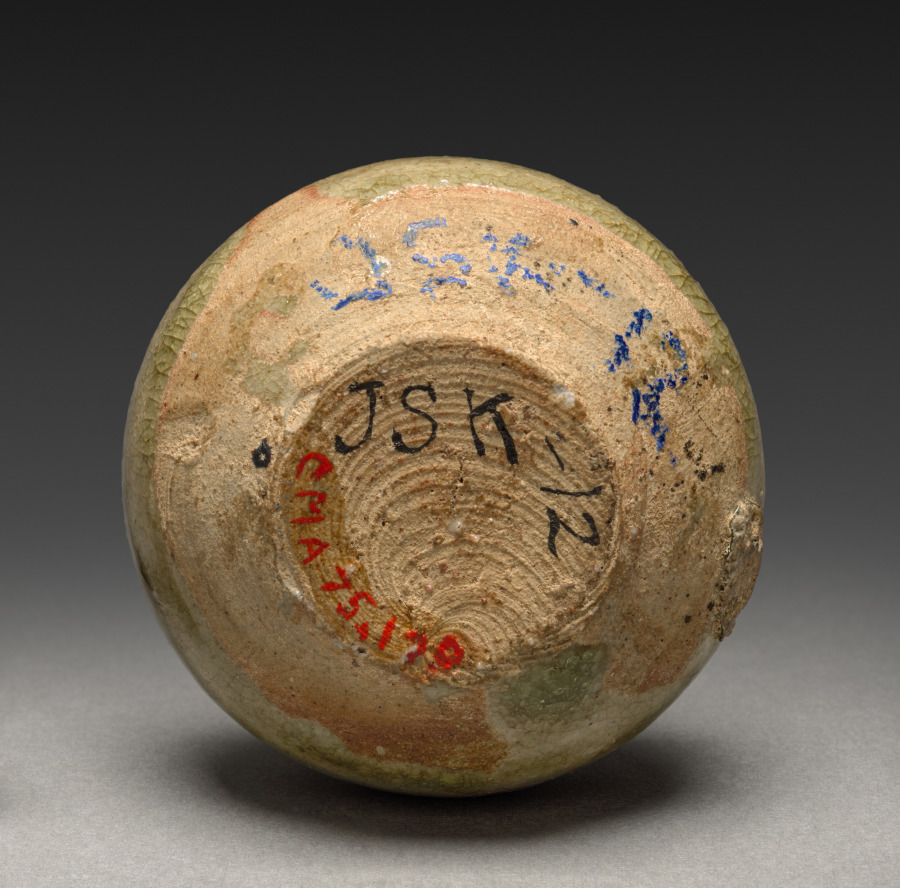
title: Incense Box: Seto Ware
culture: Japan, Kamakura period (1185–1333)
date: 1200s–1300s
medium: glazed stoneware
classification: Ceramic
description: Old Seto, also called Koseto ware, was typically coated with an ash glaze in the mineral feldspar, which produced a yellow or grayish-green glaze. This palette appealed to medieval Buddhist priests and samurai alike. The practice of burning incense in religious, court, and domestic settings dates from the early 700s in Japan.